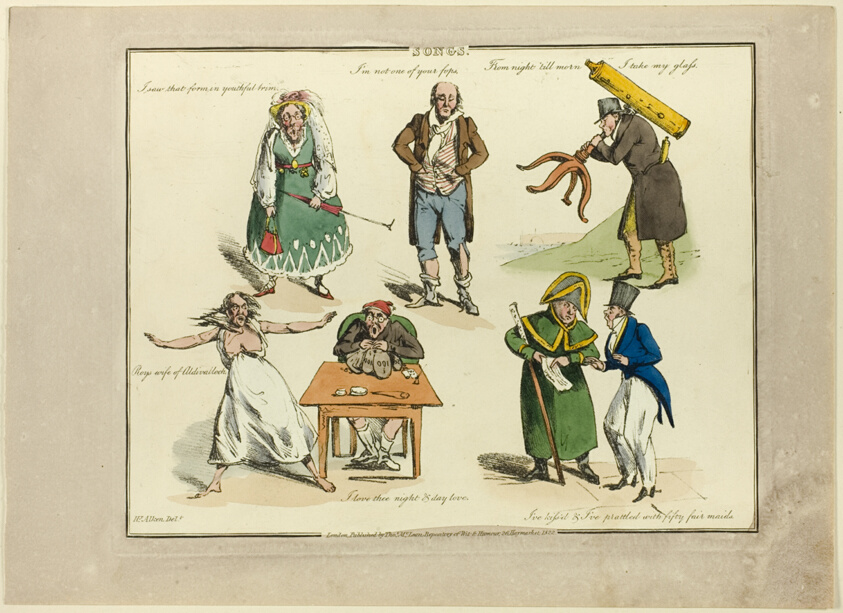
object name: Print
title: Plate from Illustrations to Popular Songs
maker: Henry Alken (English, 1785-1851); published by Thomas McLean (English, active 1790-1860)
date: 1822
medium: Soft ground etching with hand-coloring and aquatint on paper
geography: England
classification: etching; print; prints and drawing